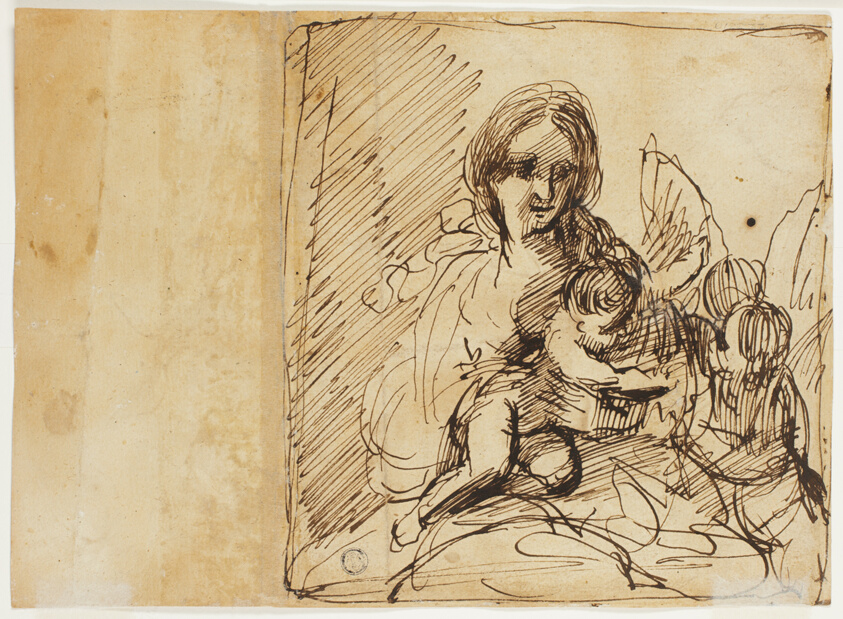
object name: Drawing and Watercolor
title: Entombment (recto); Virgin and Child with the Infant John the Baptist (verso)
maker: Imitator of Giovanni Francesco Barbieri, called Guercino; Italian, 1591-1666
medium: Pen and iron gall ink, with brush and brown wash, over traces of black chalk, on ivory laid paper, pieced and partially laid down (recto), and pen and iron gall ink on ivory laid paper (verso)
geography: Italy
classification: ink or chalk wash; drawings (visual works); prints and drawing